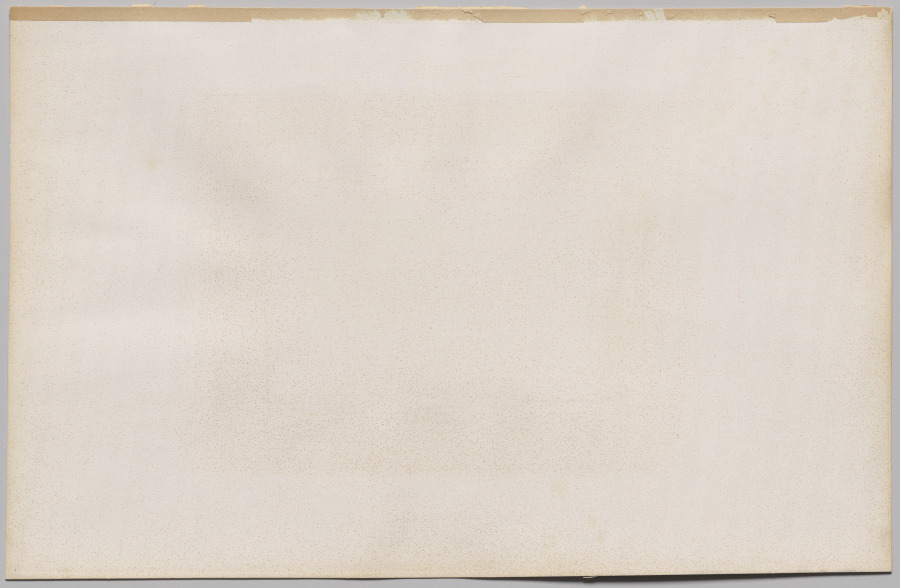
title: Vue prise du Couvent des Dominicains, Chalais (Isère), France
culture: France, 19th century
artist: Félix Thiollier (French, 1842–1914)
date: c. 1865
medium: albumen print from collodion negative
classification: Photograph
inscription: Written in graphite on recto of mount: “Prise du Covent des Dominicains-Chalais (Isere)”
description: Félix Thiollier brought to landscape photography the emotional power and mystery of the Barbizon and naturalist painters whom he collected and befriended. This dramatic view provides a deep vista more commonly found in photographs of the Western United States at the time. Underlying it, however, are a geometric structure of overlapping triangles, curved top border, and atmospheric clouds and mist that relate directly to precedents in painting.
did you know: Félix Thiollier, a wealthy industrialist, retired at 35 to pursue photography and local history.